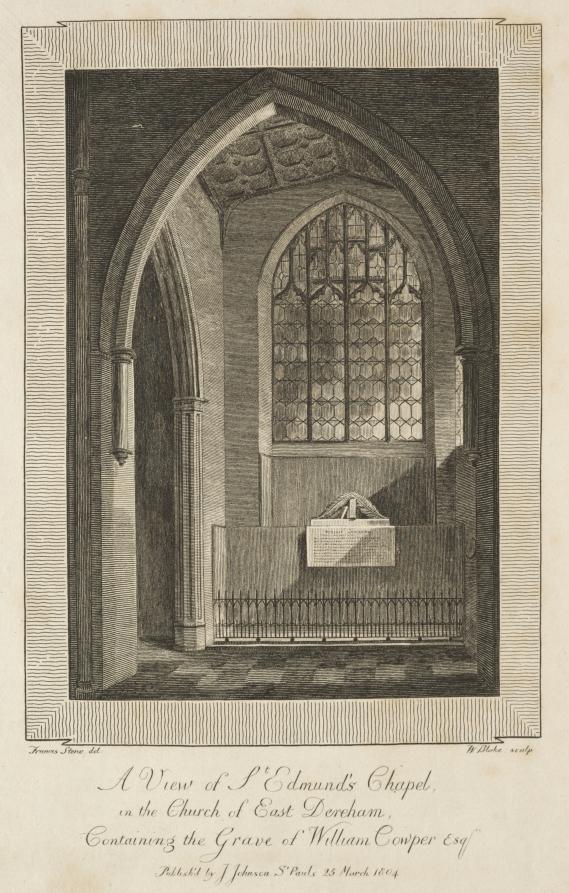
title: View of St. Edmund's Chapel in the Church of East Dereham, containing the Grave of William Cowper Esquire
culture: England, early 19th Century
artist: William Blake (British, 1757–1827)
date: 1804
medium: engraving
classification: Print